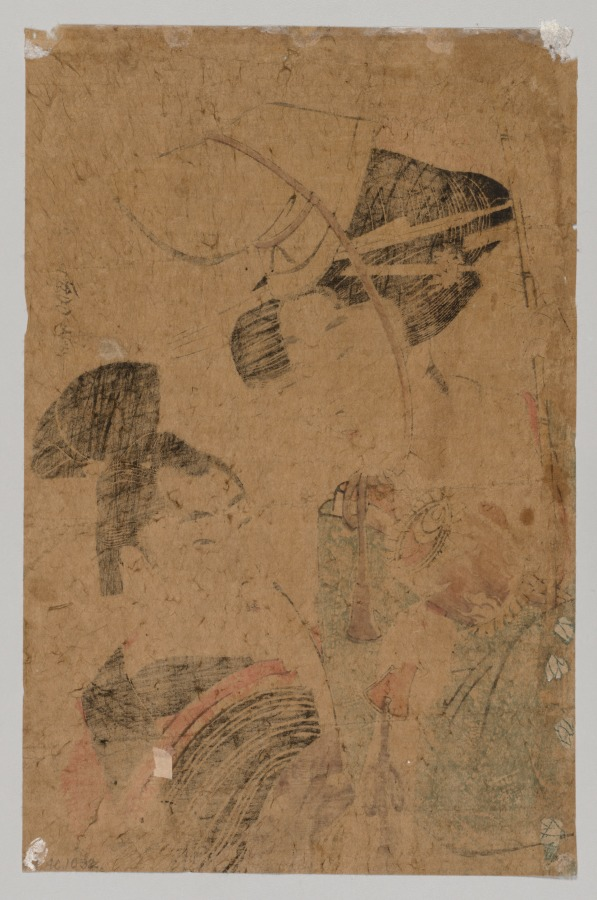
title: Woman Representing Good Fortune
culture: Japan, Edo period (1615–1868)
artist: Kitagawa Utamaro (Japanese, c. 1754–1806)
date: 1753–1806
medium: color woodblock print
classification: Print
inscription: Signature: Utagawa fude Publisher Mark: Yesakiya